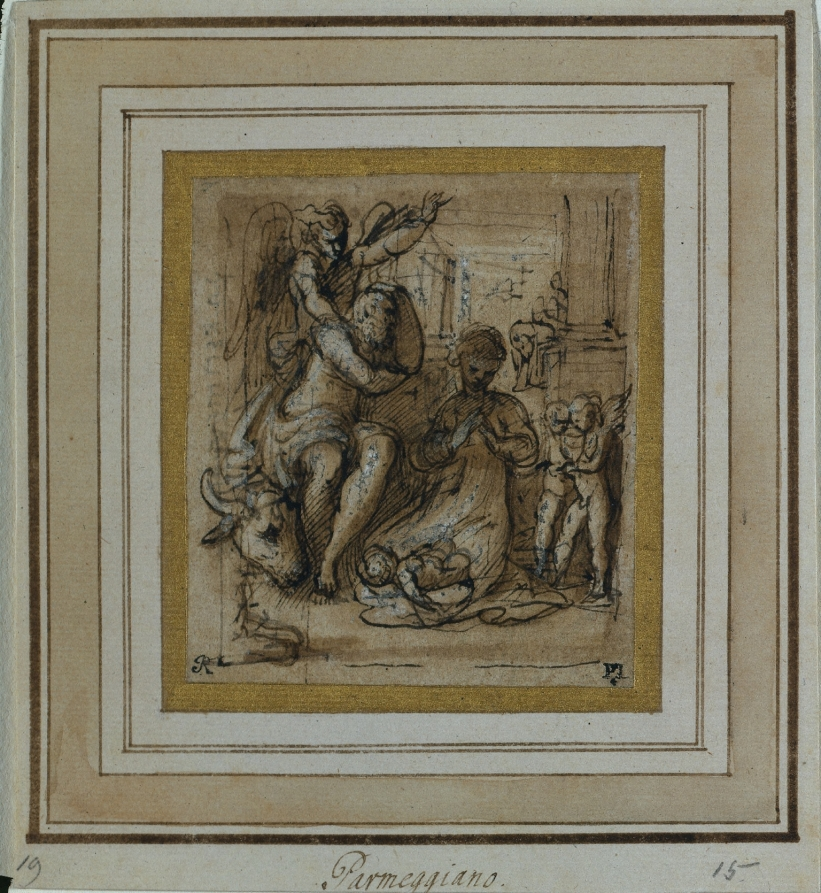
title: The Nativity with the Dream of Joseph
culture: Italy, 16th century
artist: Parmigianino (Italian, 1503–1540)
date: c. 1527/30?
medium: pen and brown and black ink and brush and brown wash, with traces of brush and black wash, heightened with lead white (oxidized)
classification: Drawing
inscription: RECTO OF SECONDARY SUPPORT, lower left, in graphite: 19 ; lower center, in brown ink: Parmeggiano. ; lower right, in graphite: 15 ; VERSO OF SECONDARY SUPPORT, lower center, in graphite: A 3541 ; FRAGMENT OF OLD MOUNT (now removed), across top, in graphite: Collns. Peter Lely (1618-1680) Lugt 2092 / J. Richardson Sr. (1665-1740) Lugt 2169. ; lower left, in graphite: Parmeggiano: The Nativity. ; across bottom, in graphite: (& Dream of joseph .. An[q?]u Waru[?]q / [lo?] [flu?] in [6?] [illegible] )